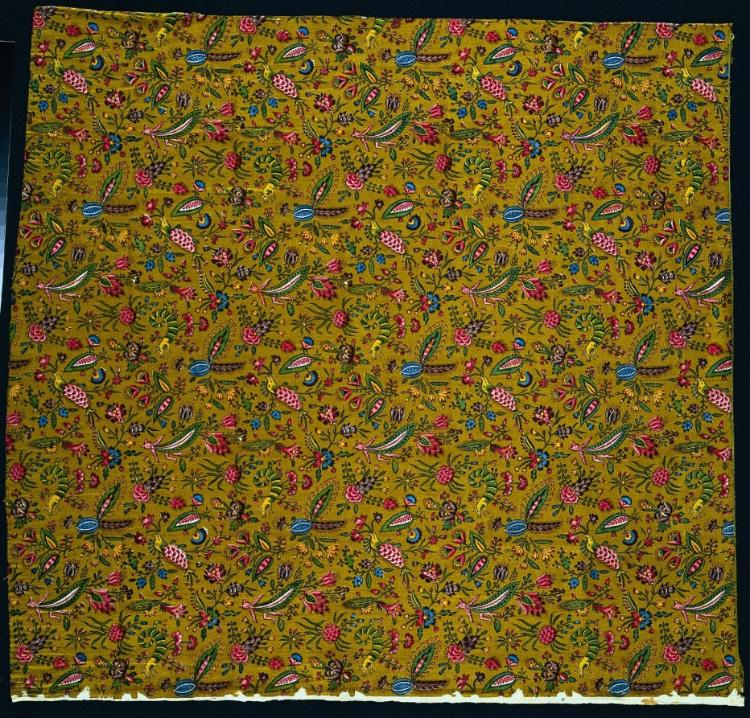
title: Strip of Woodblock Printed Cotton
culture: France, 18th century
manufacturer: firm of Christophe Philippe Oberkampf (French, 1738–1815)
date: 1780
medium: woodblock print on cotton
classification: Textile